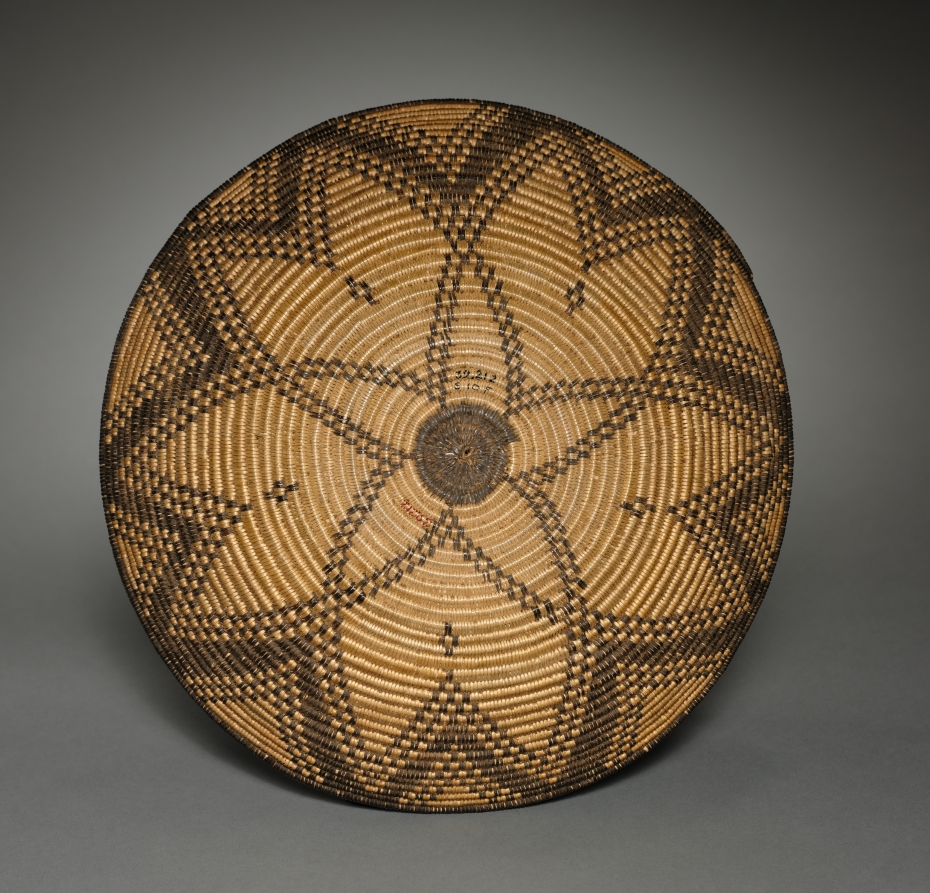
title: Tray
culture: Southwest, Apache, Western or Yavapao Apache, 20th century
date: c 1900–1939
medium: Devil's claw, Willow; Coiled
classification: Basketry